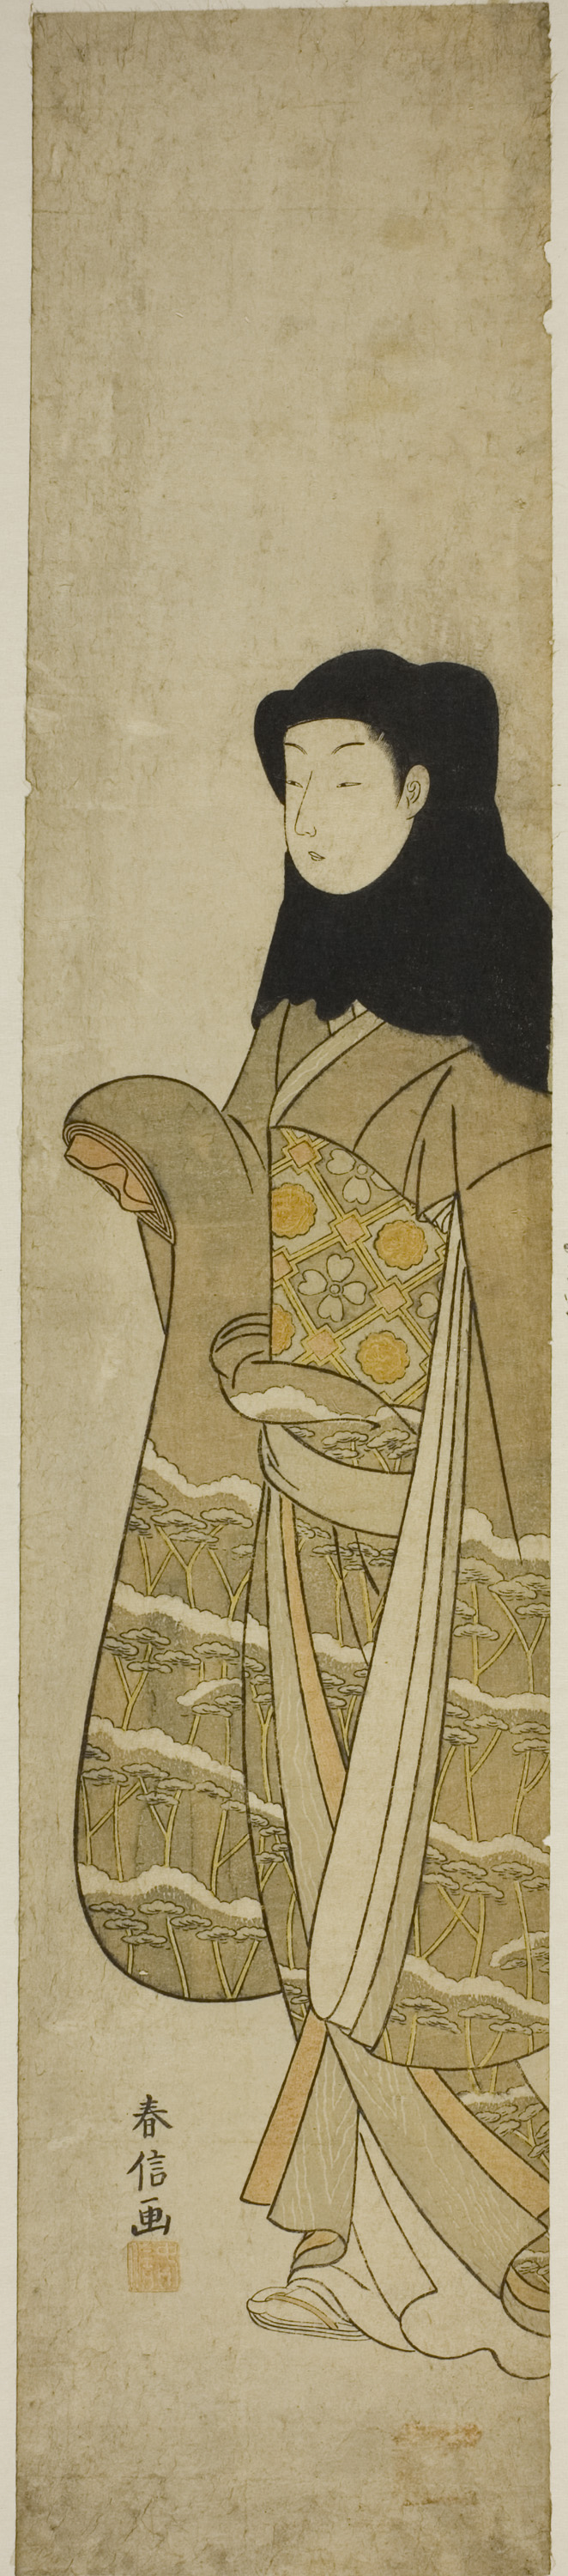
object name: Print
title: Woman Wearing Black Hood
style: Japanese (culture or style)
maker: Suzuki Harunobu 鈴木 春信; Japanese, 1725 (?)-1770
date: c. 1766/67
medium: Color woodblock print; hashira-e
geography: Japan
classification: woodblock print; print; asian art